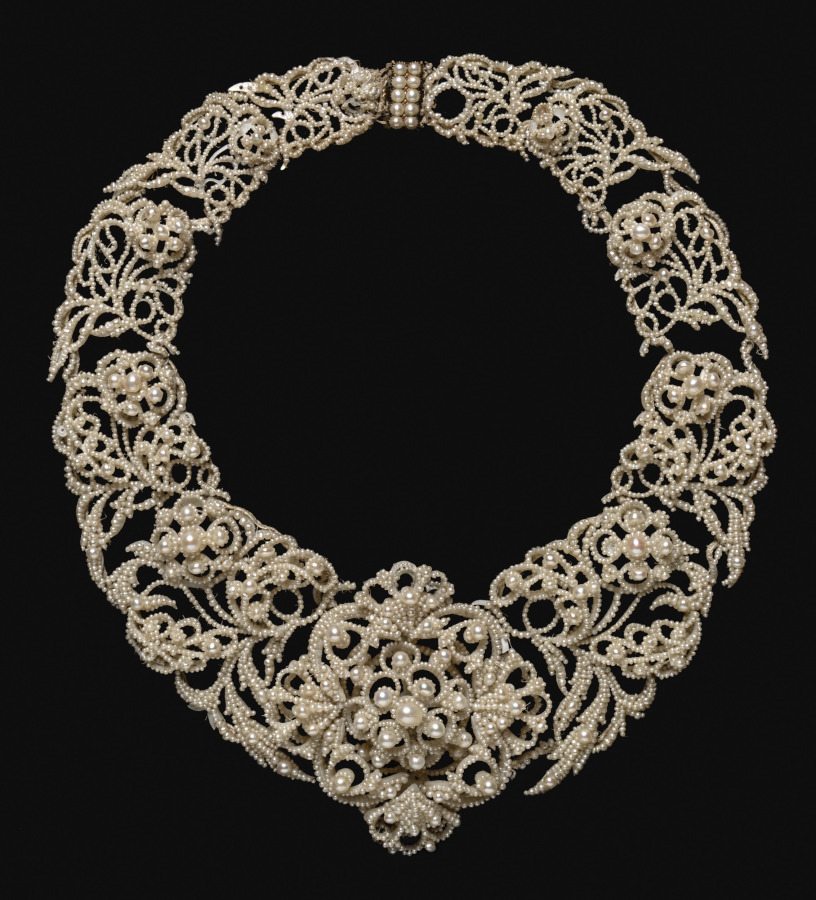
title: Necklace (Parure)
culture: England, 19th century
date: c. 1850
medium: seed pearl on Mother-of-Pearl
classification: Jewelry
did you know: A parure is a set of various items of matching jewelry popular in Europe in the early 1800s; they could include a variety of pieces such as a necklace, earrings, brooch, bracelet, or tiara.